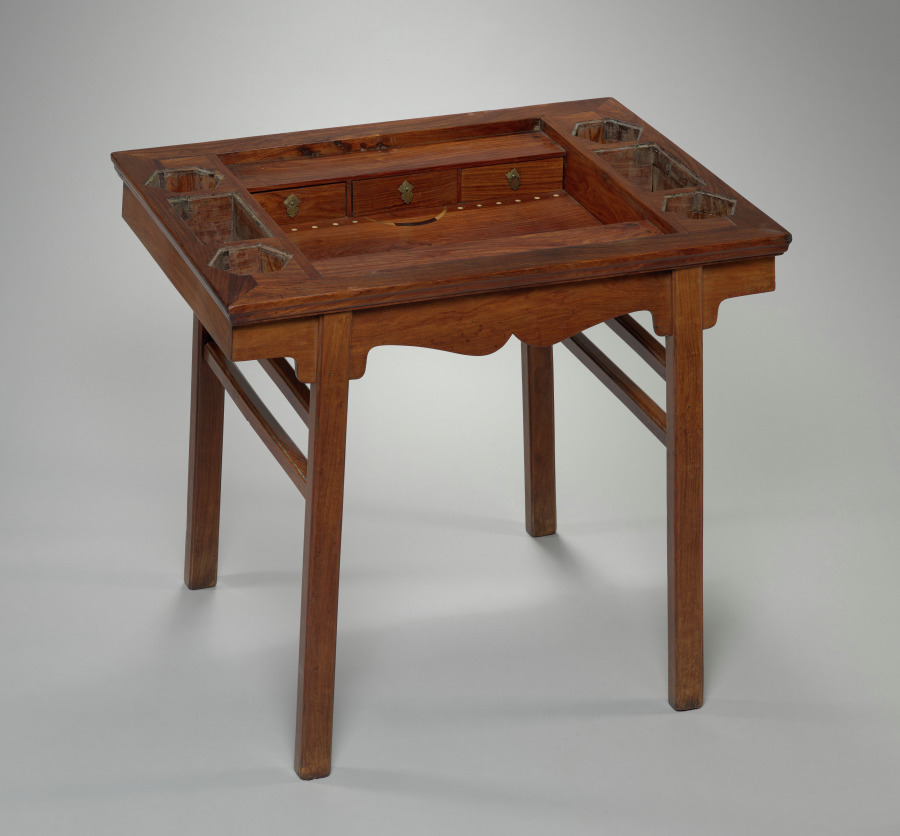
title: Game Table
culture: China, Ming dynasty (1368-1644) - Qing dynasty (1644-1911)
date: 1600s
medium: Rosewood (huanghuali)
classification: Furniture and woodwork